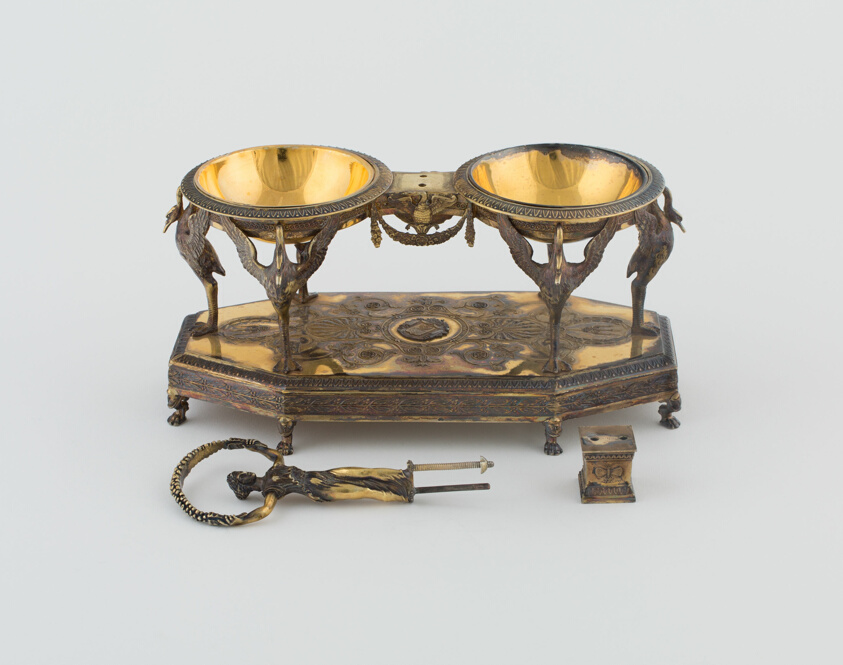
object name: Metalwork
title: Double Salt (one of a pair)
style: napoleonic, empire, Neoclassicism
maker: Martin-Guillaume Biennais (French, 1764-1843); Probably designed after Charles Percier (French, 1764-1838) and; Pierre François Léonard Fontaine (French, 1762-1853); Paris, France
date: c. 1794-1819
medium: Gilt silver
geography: Paris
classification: dish (vessel); silver; metalwork; european decorative arts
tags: Borghese Service, dining, Napoleon